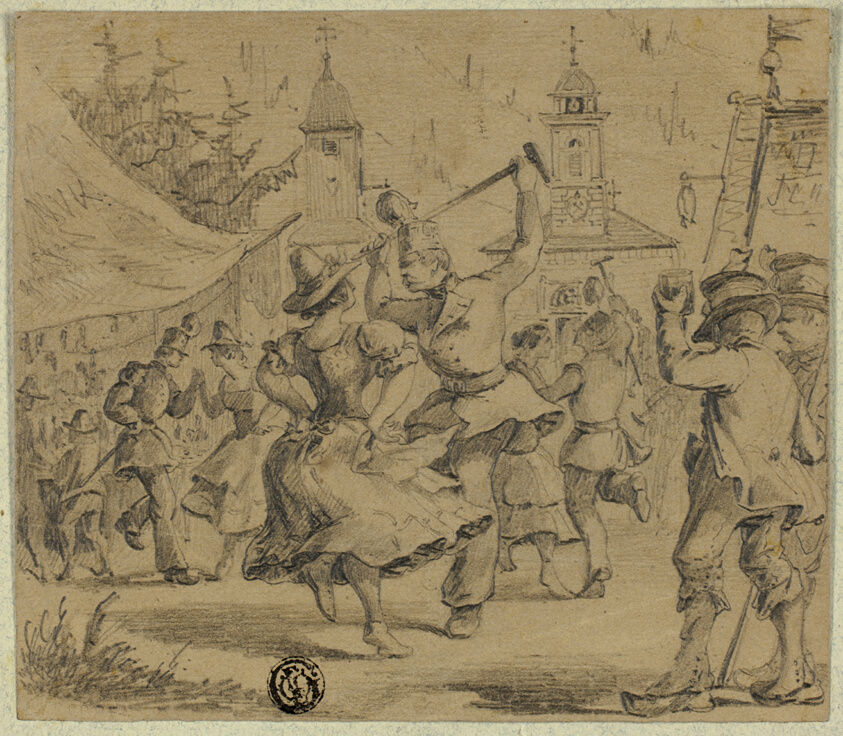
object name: Drawing and Watercolor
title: Women and Soldiers Dancing in Village Square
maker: Unknown artist; possibly German, 19th century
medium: Graphite on tan wove paper, tipped on pale green wove paper with blue fibers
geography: Germany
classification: graphite; drawings (visual works); prints and drawing